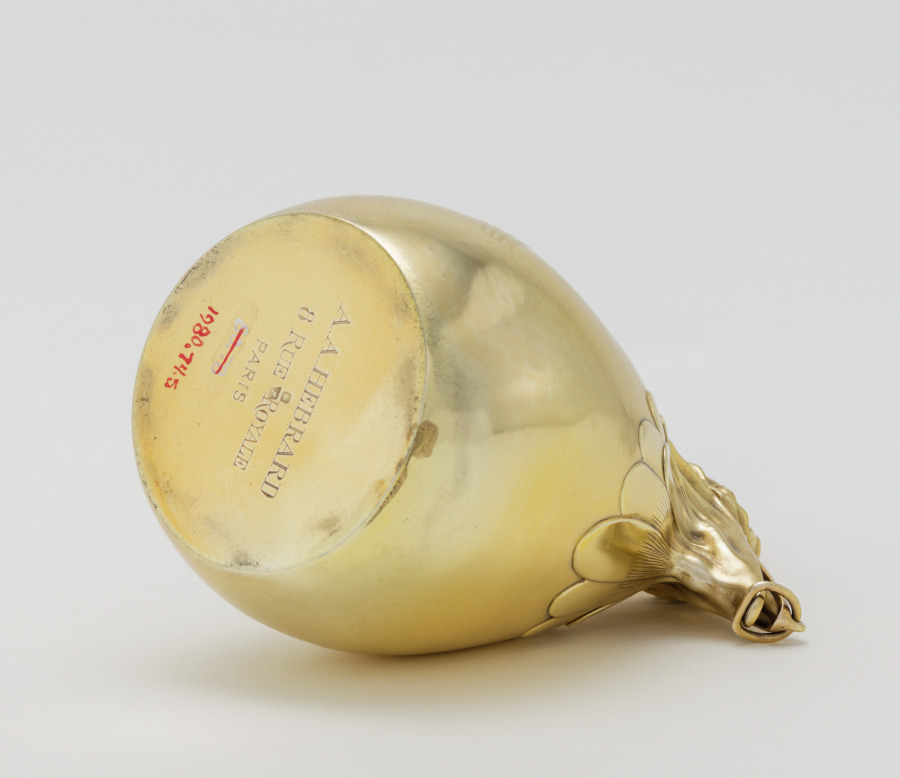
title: Coffee Pot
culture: France, Paris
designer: Carlo Bugatti (Italian, 1856–1940)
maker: Adrien-Aurélien Hebrard (French, 1866–1937)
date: c. 1907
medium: Gilt silver and ivory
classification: Silver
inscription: Made by A. A. Hebrard Firm, Paris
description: This tea and coffee service, salver, and table, together with some now missing cups, were all designed by Carlo Bugatti as an ensemble and presented at the 1902 exposition devoted to decorative arts in Turin, Italy. The set was probably acquired from Bugatti's 1907 exhibition at the Galerie Hébrard in Paris by a wealthy South African widow, Anna Blake, who was living there at the time. Some of the animal and insect motifs suggest mythical beasts or the fossils of prehistoric animals. When Mrs. Blake returned to Cape Town, she took these and other pieces designed by Bugatti with her, and they remained in South Africa throughout her lifetime.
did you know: This coffee pot is part of a larger tea and coffee service designed by Carlo Bugatti.